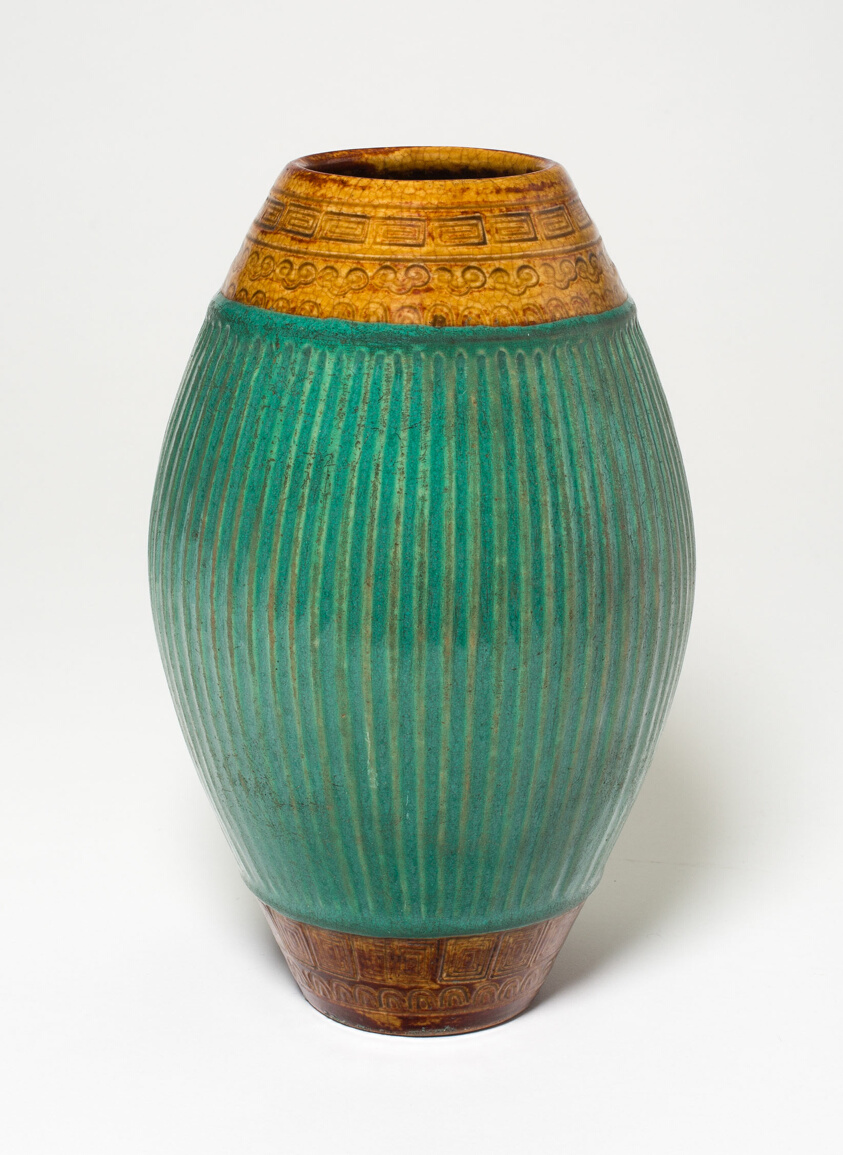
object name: Vessel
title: Vase with Ribs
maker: China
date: Ming dynasty (1368 –1644)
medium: Stoneware with green and brown glazes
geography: China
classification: stoneware; ceramics; asian art